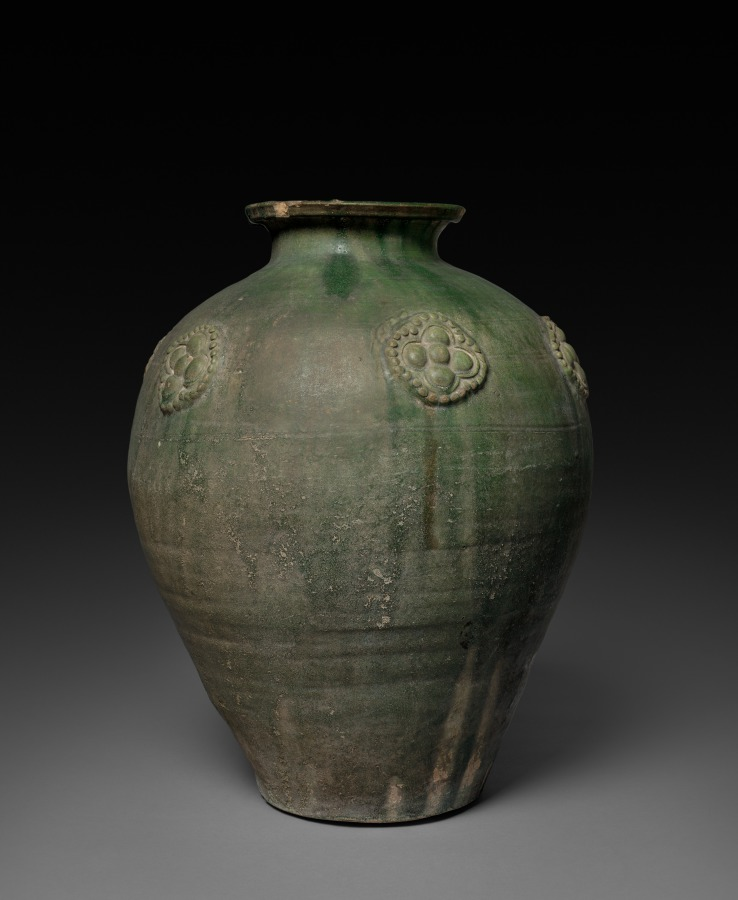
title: Jar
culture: China, Six Dynasties period (265-589) or Sui dynasty (581-618)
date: 500s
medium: glazed earthenware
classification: Ceramic